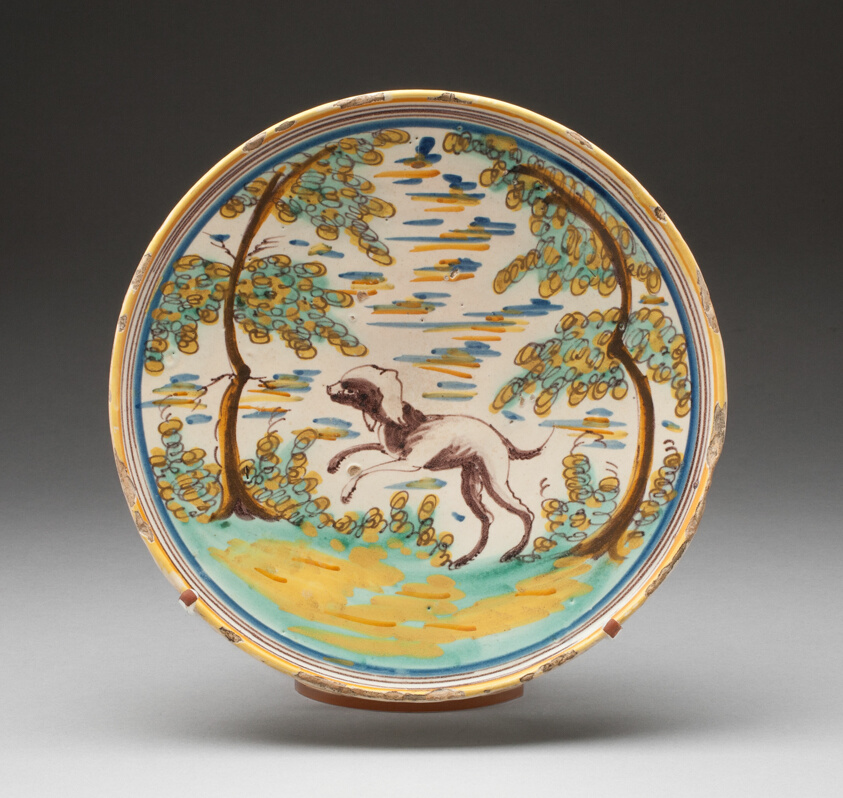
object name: Ceramics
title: Charger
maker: Talavera de la Reina Potteries (Spanish, founded mid-16th century)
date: 17th century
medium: Tin-glazed earthenware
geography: Spain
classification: dish (vessel); earthenware; european decorative arts; ceramics